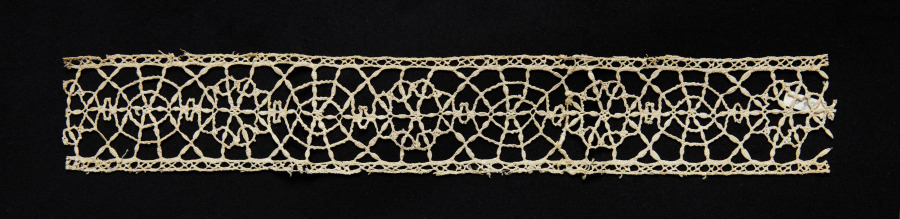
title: Lace Insertion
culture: Italy, Genoa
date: 1550–99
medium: Bobbin lace (needle lace, reticella design)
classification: Lace